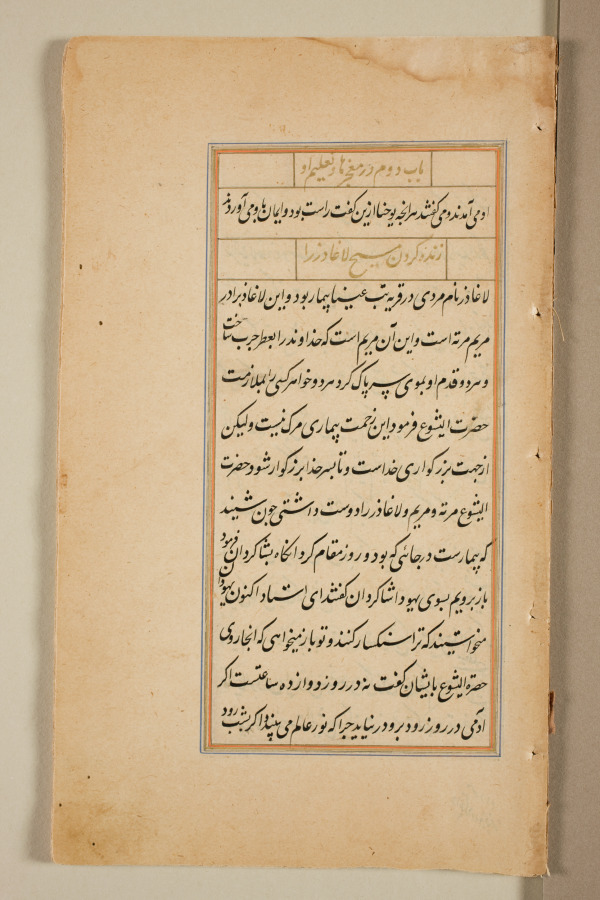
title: Text page from a Mirror of Holiness (Mir’at al-quds) of Father Jerome Xavier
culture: Mughal India, Allahabad, made for Prince Salim (1569–1627)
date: 1602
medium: Ink and gold on paper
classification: Manuscript